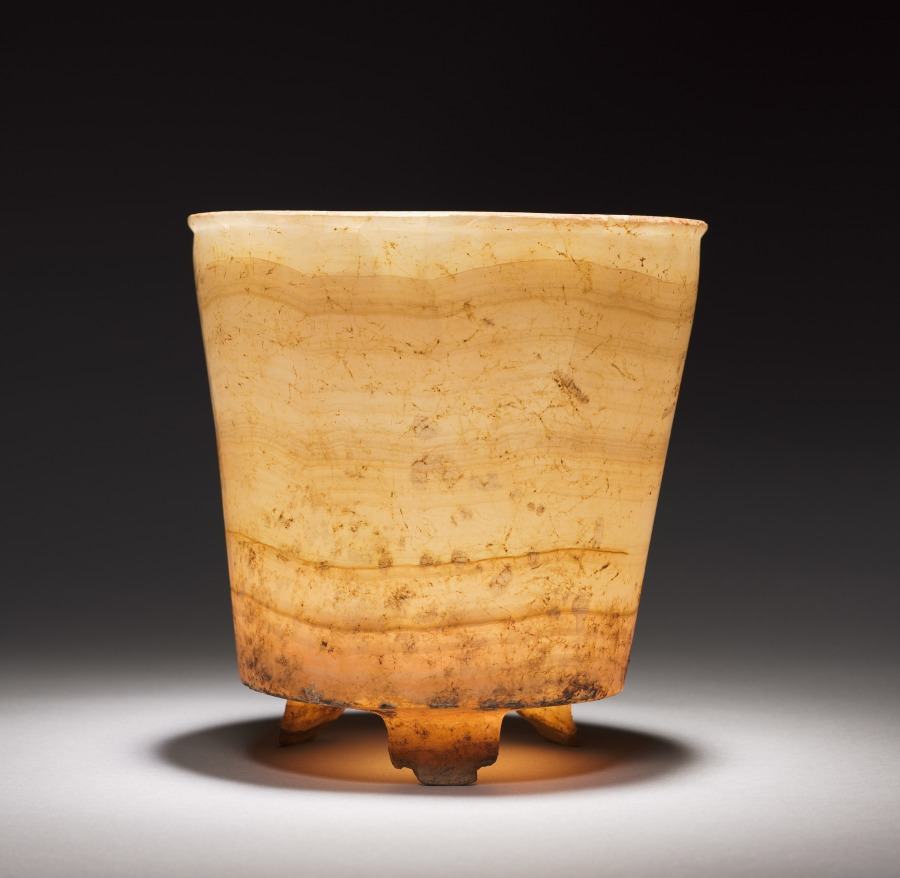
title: Offering Group: Vessel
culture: Mexico, Guerrero(?), San Jerónimo de Juárez, Xochicalco style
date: c. 800–1200(?)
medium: travertine or tecali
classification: Sculpture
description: The objects in this group, all with traces of red pigment, are said to have been found together, the shells and greenstone plaque inside the translucent stone vessel. A similar offering was found in a pyramid ornamented with feathered serpents at Xochicalco, a site south of the Valley of Mexico.